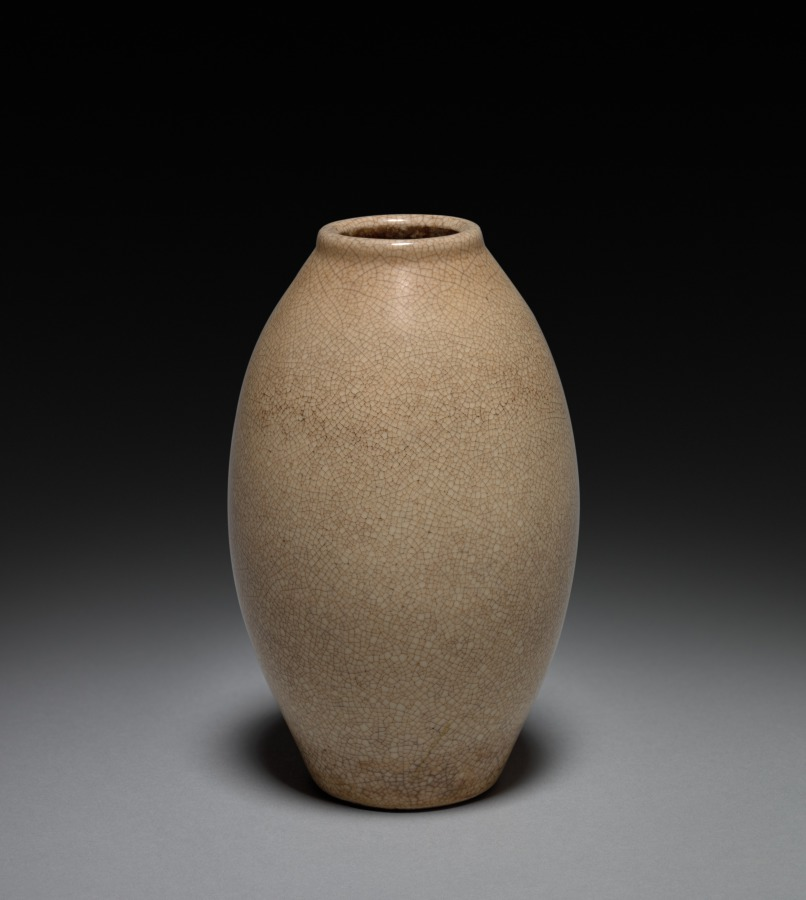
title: Vase: Dhong-ke Ware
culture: China, Ming dynasty (1368–1644)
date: 1368–1644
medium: white crackled stoneware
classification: Ceramic